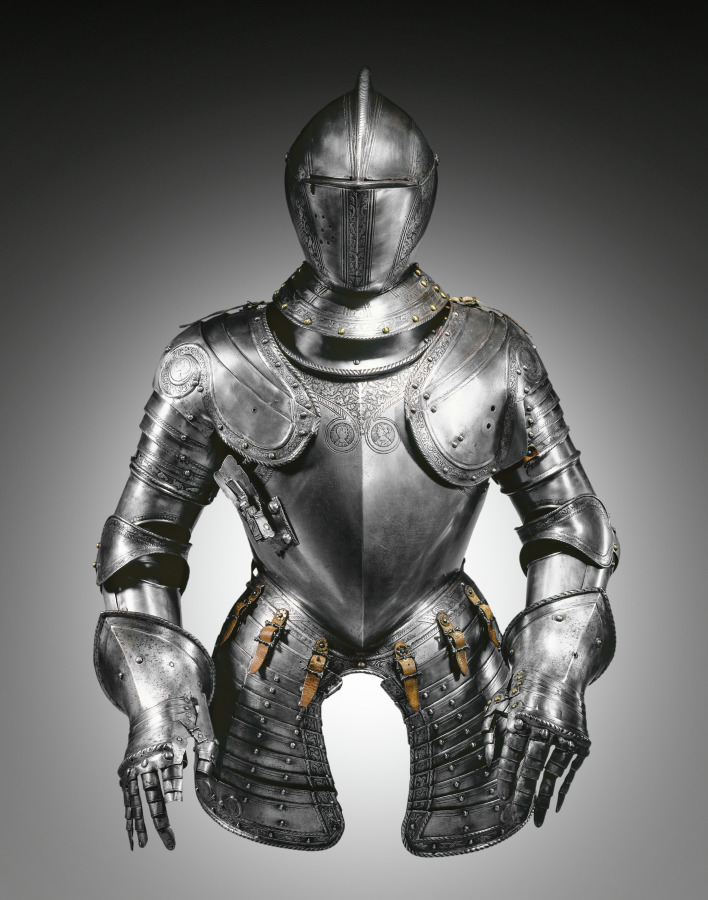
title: Half-Suit of Armor for the Field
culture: North Italy, Brescia (?), 16th century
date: c. 1575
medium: steel with etched decorative bands and roundels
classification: Arms and Armor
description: Decoration was critical to fine armor, and etching was the most commonly used technique. Here, the bands along the borders are etched. On the breastplate, pauldrons (shoulder guards), and tassets (hip and upper leg guards), etched medallions enclose profile busts reminiscent of ancient Roman portraits. The lance rest on the breastplate indicates that this half-suit was once part of a complete field armor for man and horse. The etching technique used for armor was developed in the late 1400s. The metal surface was first coated with an acid-resistant substance, such as wax or varnish. An etching needle was then used to scratch a design into the surface. The exposed areas were then treated with an acid that would "bite" or etch the lines into the metal. When the coating was removed, the etched design was blackened for contrast.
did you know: This is an example of raised field etching where the design stands out in slight relief from the background.